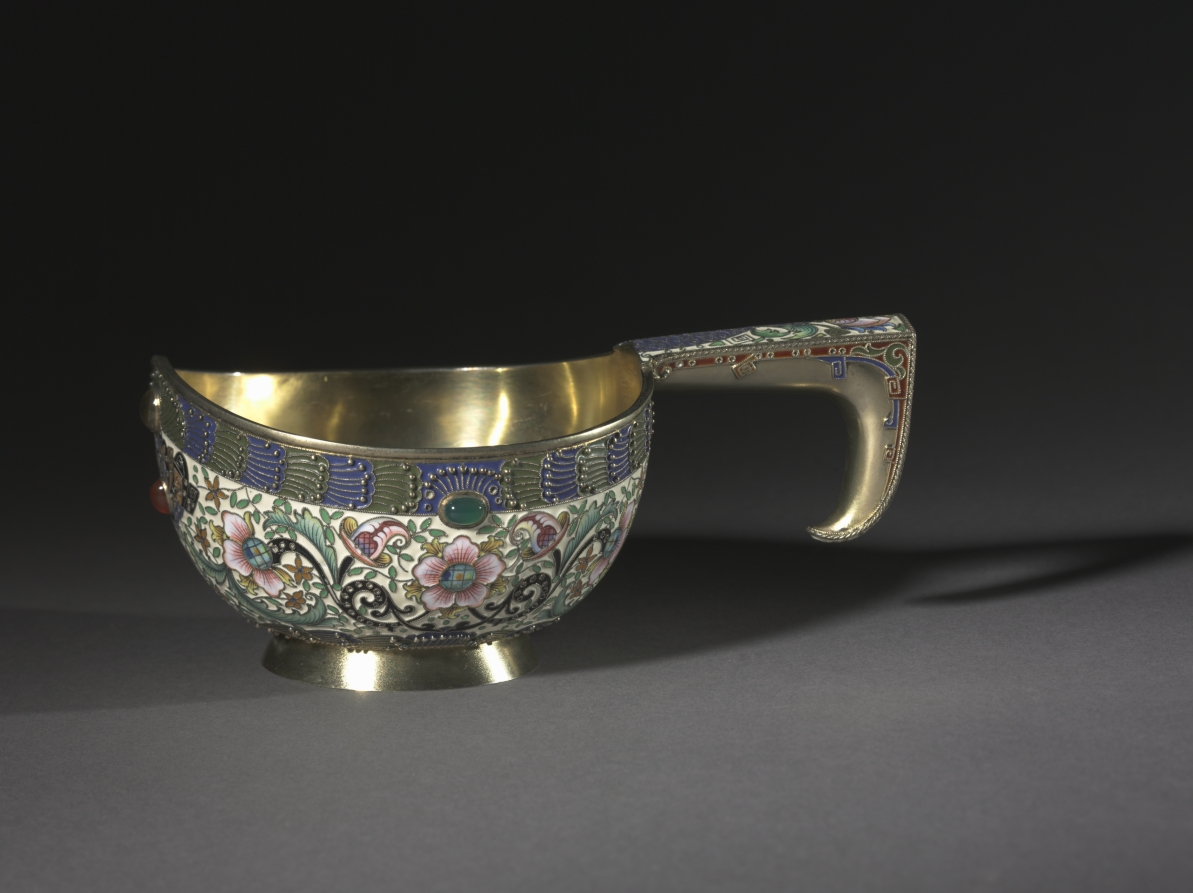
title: Kovsh (Cup)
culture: Russia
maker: House of Fabergé (Russian, 1842–1918)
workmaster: Feodor Ivanovich Rückert (Russian, 1840–1917)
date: 1896–1906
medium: silver gilt, enamel, cabochon gems, chrysoprases, carnelians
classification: Miscellaneous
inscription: inscribed on bottom: "CH" in script monogram (owner's initials).